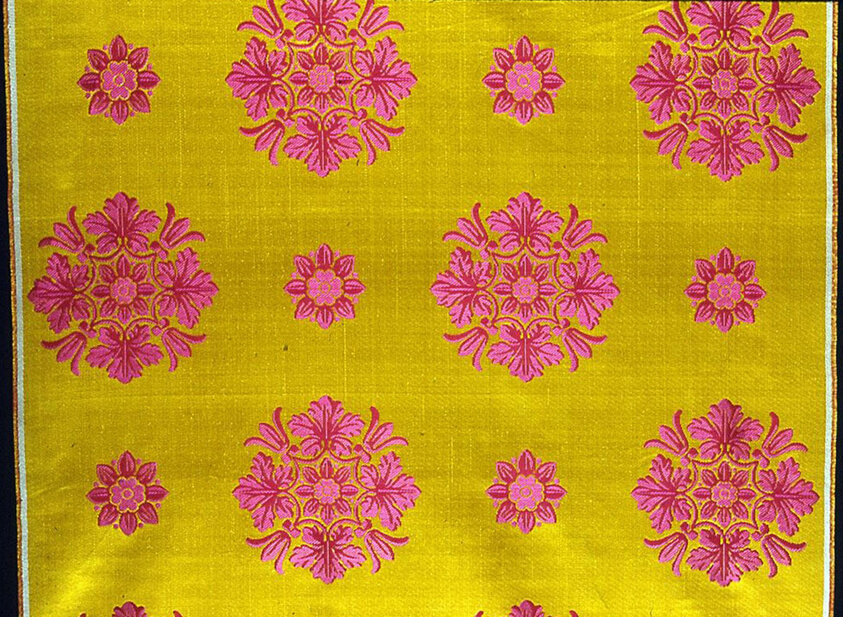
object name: Textile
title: Panel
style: empire, european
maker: France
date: 1800/50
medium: Silk, warp-float faced 4:1 satin weave with weft-float faced 1:3 'Z' twill interlacings of secondary binding warps and supplementary patterning wefts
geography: France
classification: textile; weaving